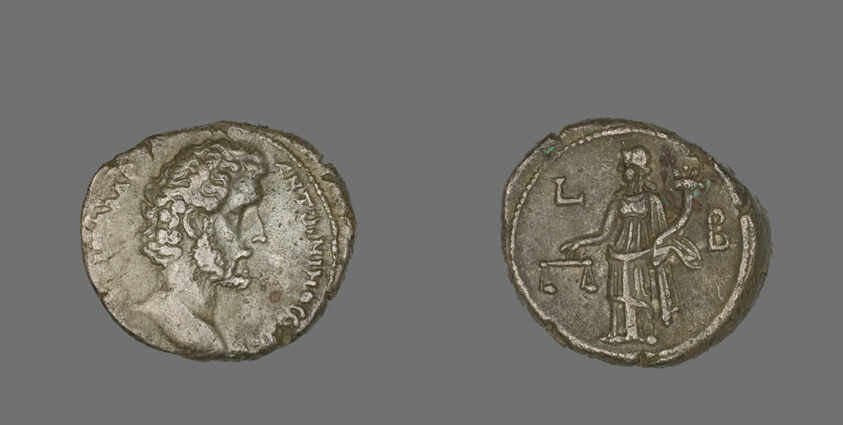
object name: Coin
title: Coin Portraying Emperor Antoninus Pius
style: roman period (egyptian), greco-roman (egyptian)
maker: Roman, minted in Alexandria, Egypt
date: 138-9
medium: Billon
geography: Egypt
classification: coin; ancient art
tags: portraits